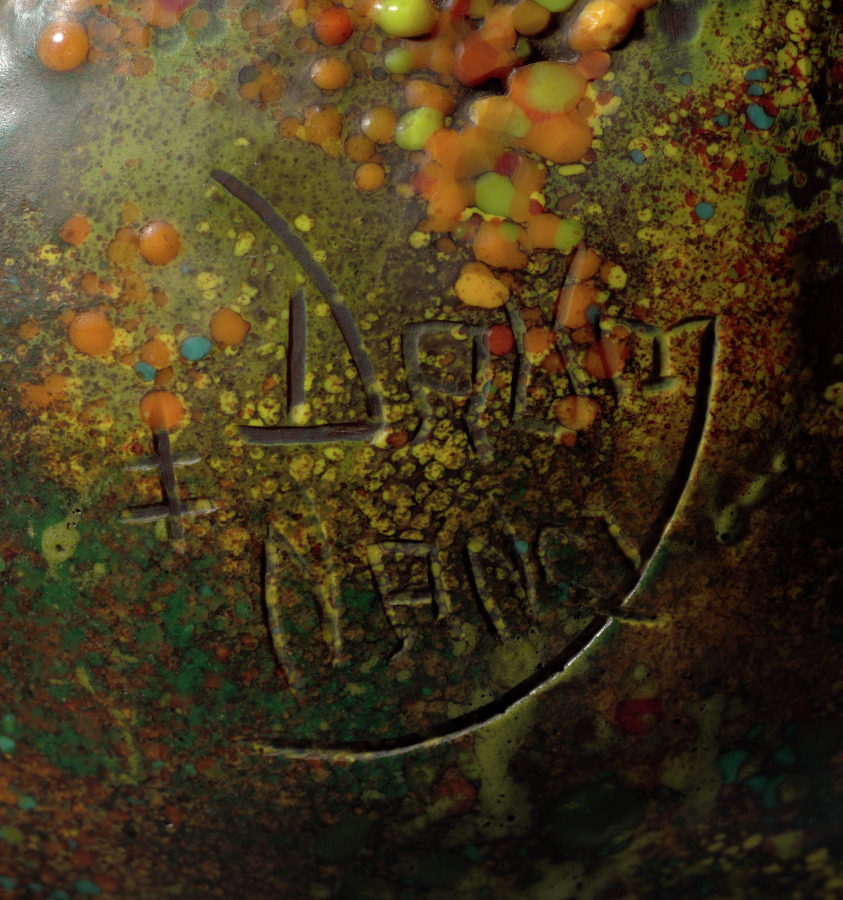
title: Vase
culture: France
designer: Daum Frères (French, founded 1875)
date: c. 1910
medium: Blown, cast, and vitrified glass with applied, wheel-engraved decoration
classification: Glass